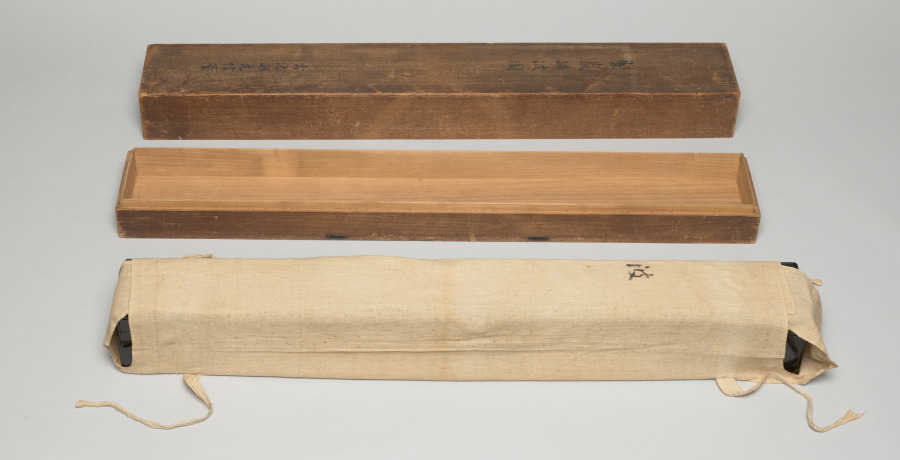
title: Rocks and Waves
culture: Japan, Muromachi period (1392–1573)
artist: attributed to Kano Motonobu (Japanese, c. 1476–1559)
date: early to mid-1500s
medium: sliding door fragment mounted as a hanging scroll; ink and gold wash on paper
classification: Painting